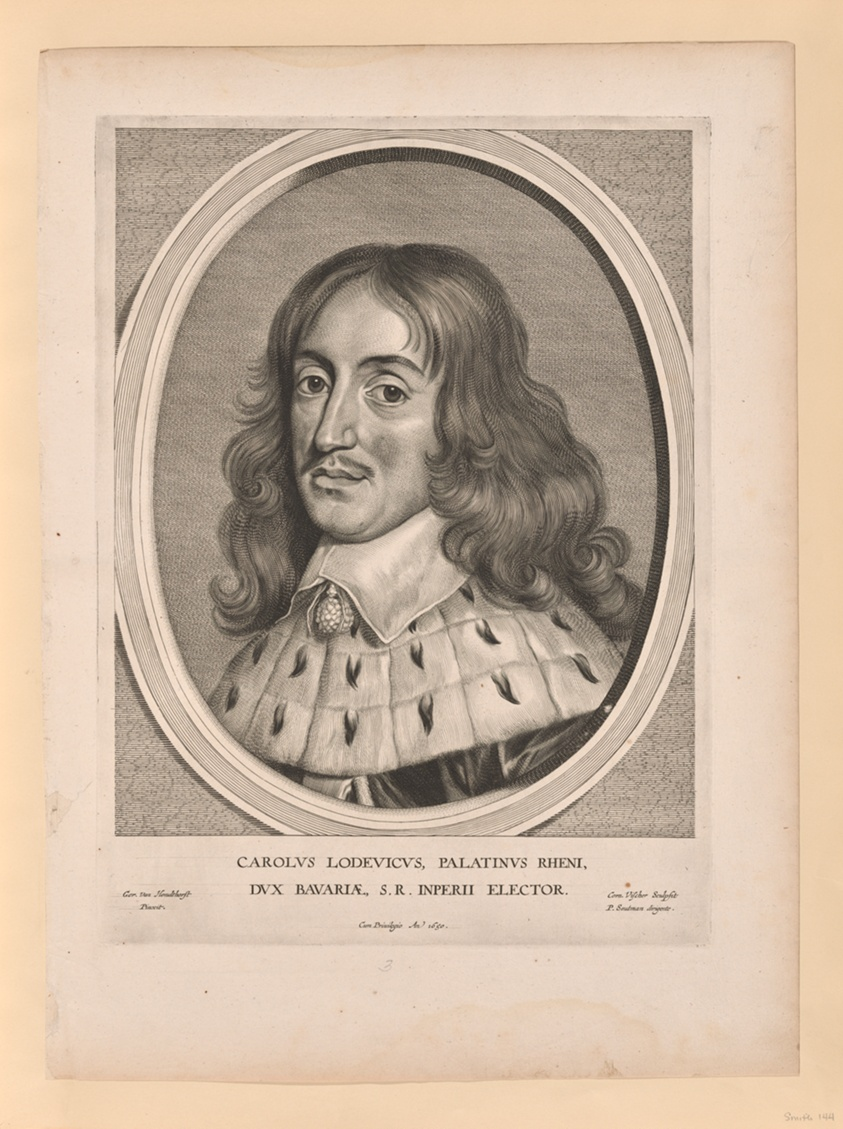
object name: Print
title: Charles Louis, Count Palatine, from Effigies Variae...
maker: Cornelis Visscher (Dutch, c. 1629-1658); after Gerrit van Honthorst (Dutch, 1592-1656)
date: 1650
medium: Engraving on paper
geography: Netherlands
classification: engraving; paper; print; prints and drawing